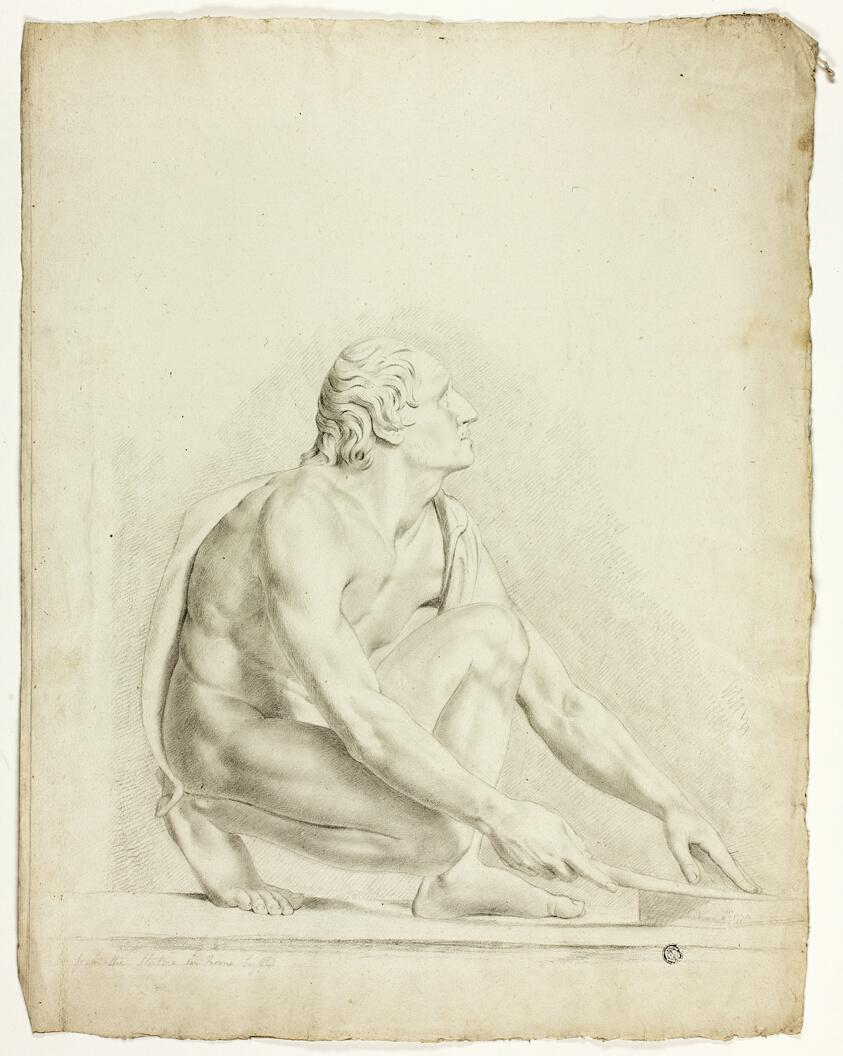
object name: Drawing and Watercolor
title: Ancient Statue: the Knifegrinder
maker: John Downman (English, 1750-1824)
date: 1774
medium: Graphite with stumping on off-white laid paper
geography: England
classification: graphite; paper; drawings (visual works); prints and drawing